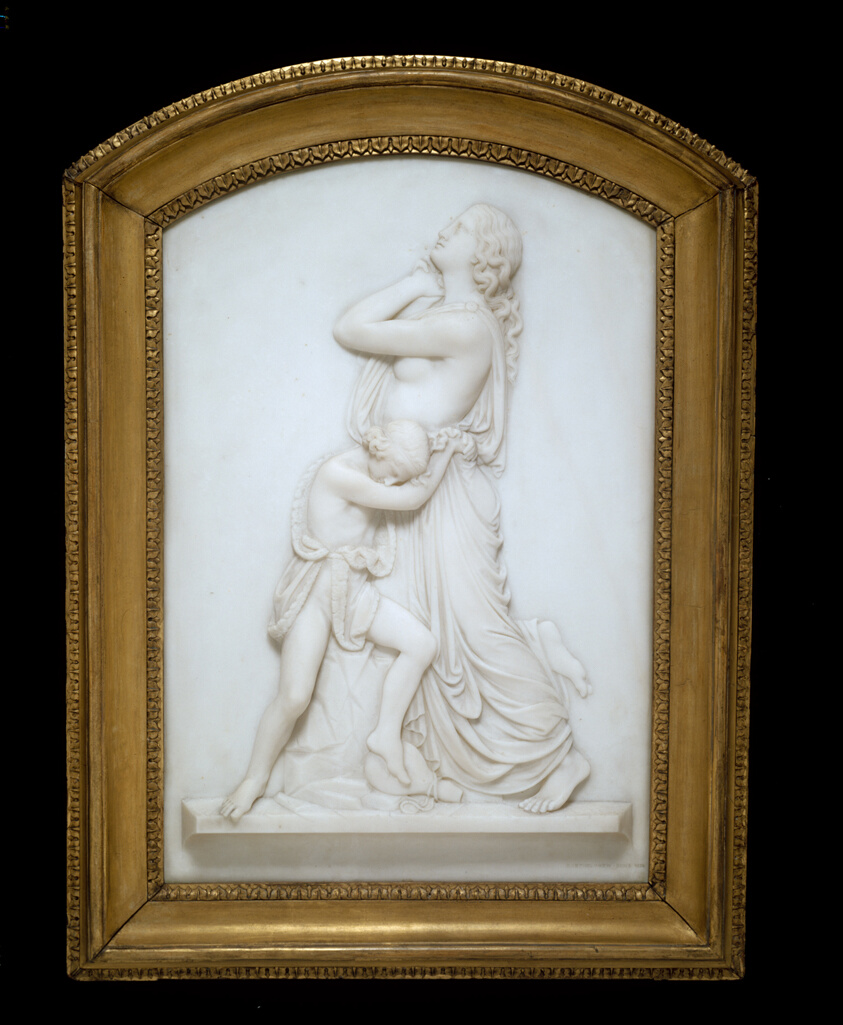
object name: Sculpture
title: Hagar and Ishmael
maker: Edward Sheffield Bartholomew (American, 1822–1858)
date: 1856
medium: Marble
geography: Rome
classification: sculpture; american arts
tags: people, portraits